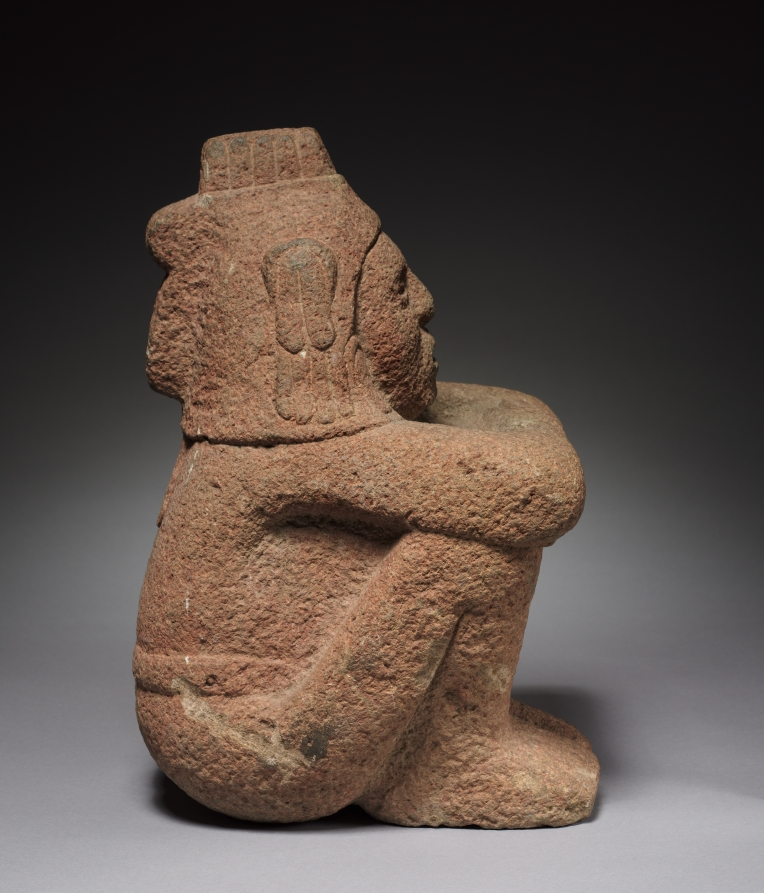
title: Seated Deity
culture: Mexico, Aztec, Valley of Mexico near Teotihuacan, Macuilxochitl (?), 14th-16th century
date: 1350–1519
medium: gray volcanic stone with red pigment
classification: Sculpture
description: The crested headdress with tassels suggests that this youthful, seated male is Macuilxochitl (Five Flower), an Aztec supernatural patron of many forms of pleasure, among them music, dance, feasting, games, and sex. His cult was popular among common people, and this effigy probably was created for use in a small neighborhood temple. The stone surface could have been plastered and then brightly painted.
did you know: The Aztecs associated the number 5 with excess: there were five gods of pleasure, one named “Five Flower.”